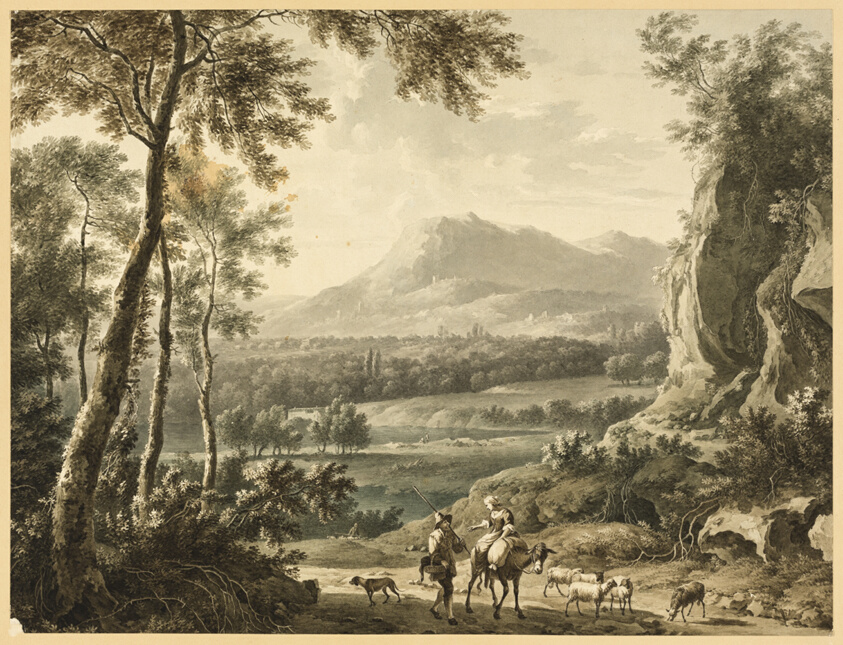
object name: Drawing and Watercolor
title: Italianate Landscape with Traveling Peasants in Foreground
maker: After Frederick de Moucheron; Dutch, 1633-1686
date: 1700/99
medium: Watercolor with incising, over graphite, on ivory wove paper, laid down on tan board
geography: Netherlands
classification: watercolor; drawings (visual works); prints and drawing